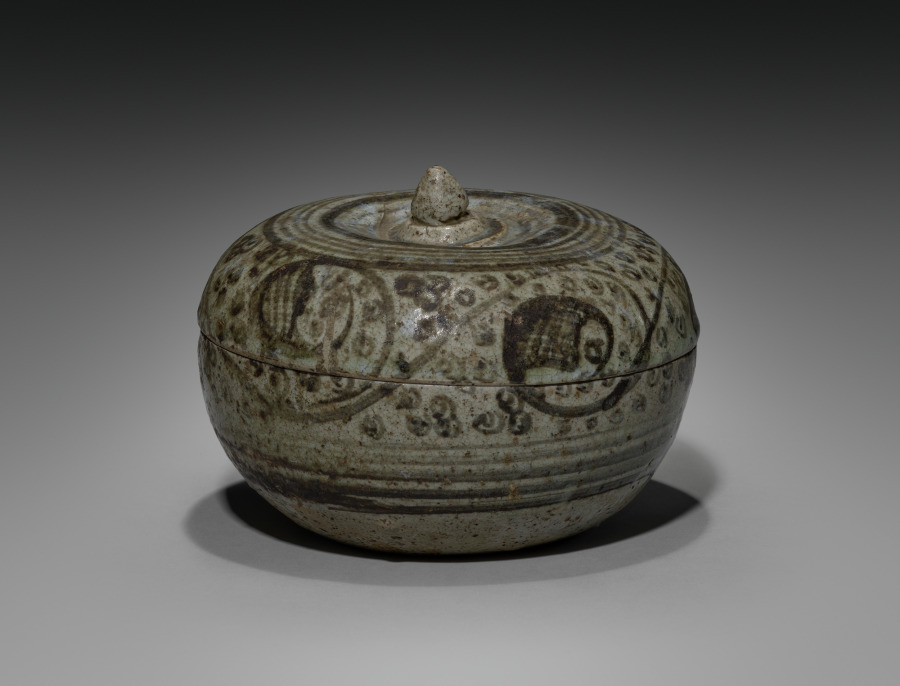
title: Covered Bowl with Painted Decoration with Lid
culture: Siam, Sawankhalok ware, 15th century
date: 1400s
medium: stoneware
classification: Ceramic